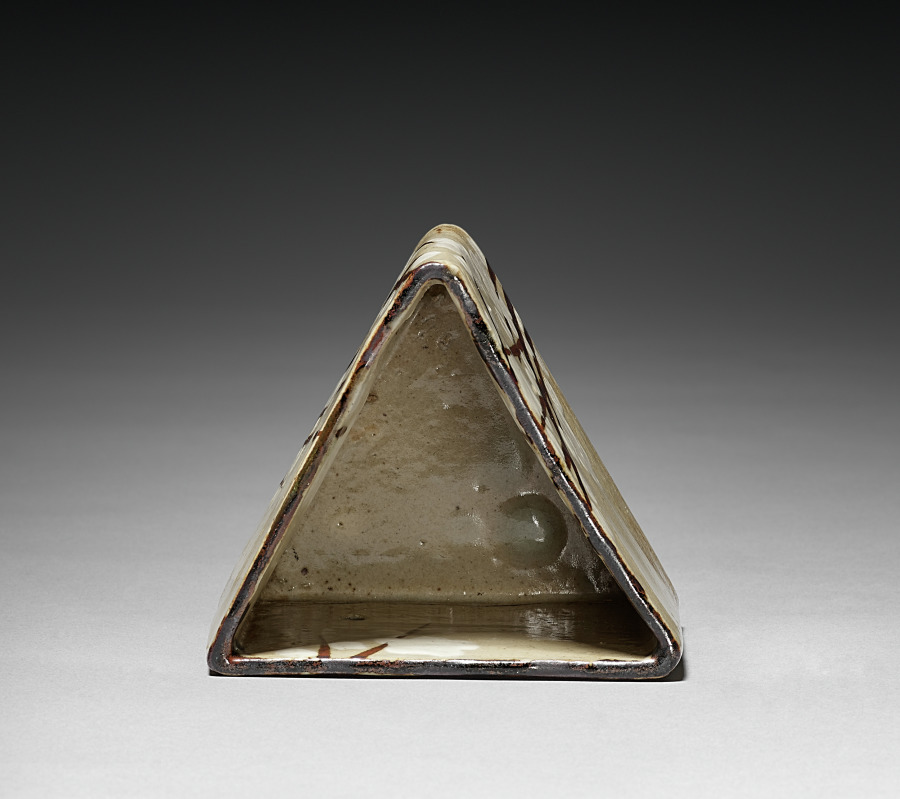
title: One of Five Serving Bowls (Mukozuke) with Prunus Design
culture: Japan, Edo period (1615–1868)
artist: school of Ogata Kenzan (Japanese, 1663–1743)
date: 1700s to mid-1800s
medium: Kyoto Ware: stoneware with underglaze iron oxide and slip decoration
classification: Ceramic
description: Note the rough, tan, clay bodies of these bowls with their deliberate irregularities. The design of branches was first painted in a black iron oxide, then the blossoms and buds in a white slip, followed by the application of a very thin transparent overglaze.